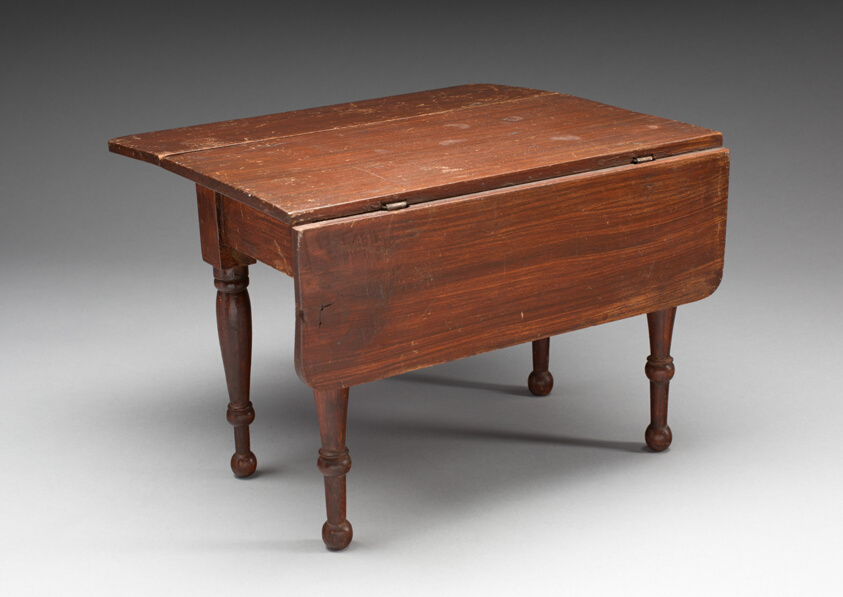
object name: Decorative Arts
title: Toy Table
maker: Artist unknown (American, 19th century)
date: 1820–40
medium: White pine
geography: United States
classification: table; furniture; american decorative arts; american arts; decorative arts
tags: furniture